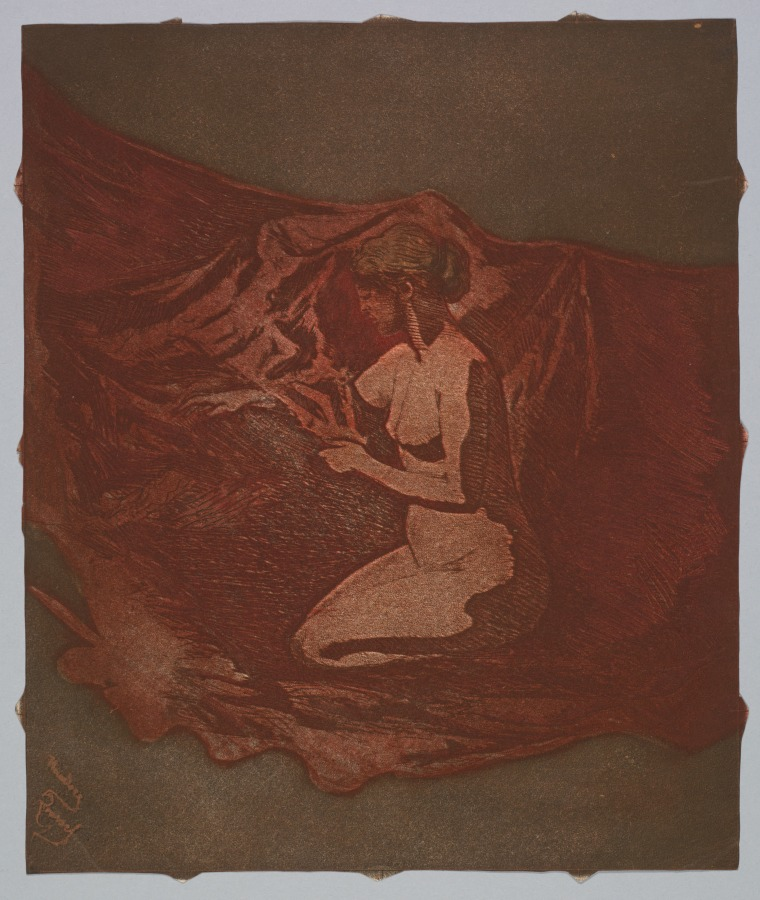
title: Embers Glow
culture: France, 19th century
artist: Theodore Roussel (French, 1847–1926)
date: 1890–1897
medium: color etching and aquatint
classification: Print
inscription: verso, in purple pencil: 3 verso, in graphite: 9